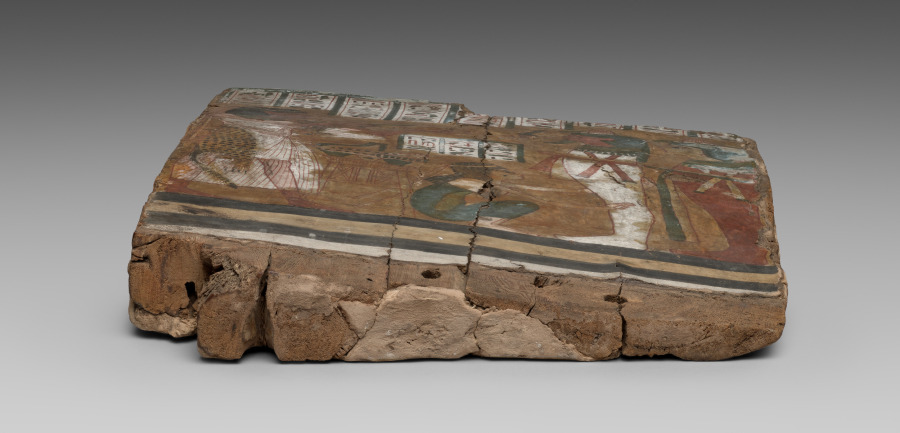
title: Side Panel from the Coffin of Amenemope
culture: Egypt, Thebes, Third Intermediate (1069–715 BCE), Dynasties 21–22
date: c. 976–889 BCE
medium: gessoed and painted sycamore fig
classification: Funerary Equipment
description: This panel illustrates one of the same scenes shown on the inside of Nesykhonsu’s coffin, allowing us to compare different artist’s styles. On the right stand the mummies of the priest Amenemope and his wife, Taditkhonsu. Their daughter, called "the lady of the house, Mutemperes," crouches before them with her hands wrapped around Amenenope’s legs in a traditional gesture of mourning. On the left, a priest, dressed in his finest linen garments and panther skin, holds in his upraised hands an incense burner and a curious curved implement typically associated with the "opening of the mouth" ritual, in which the mummy’s mouth was magically opened so that the deceased person could take in food and thus be brought back to life.